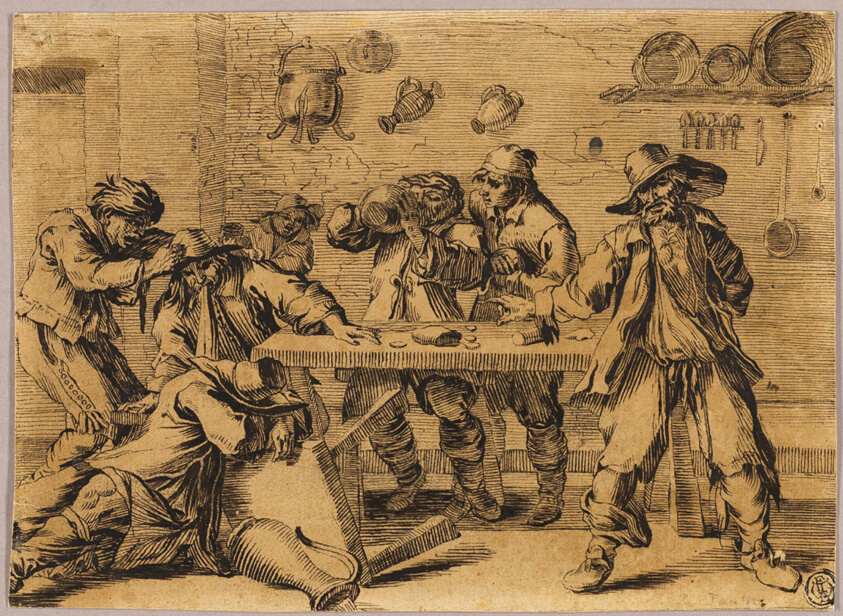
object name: Drawing and Watercolor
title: Tavern Scene with Carousing Men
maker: After Jean Le Pautre; French, 1618-1682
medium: Pen and black-brown ink on dark tan laid paper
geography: France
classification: pen and ink drawings; paper; drawings (visual works); prints and drawing